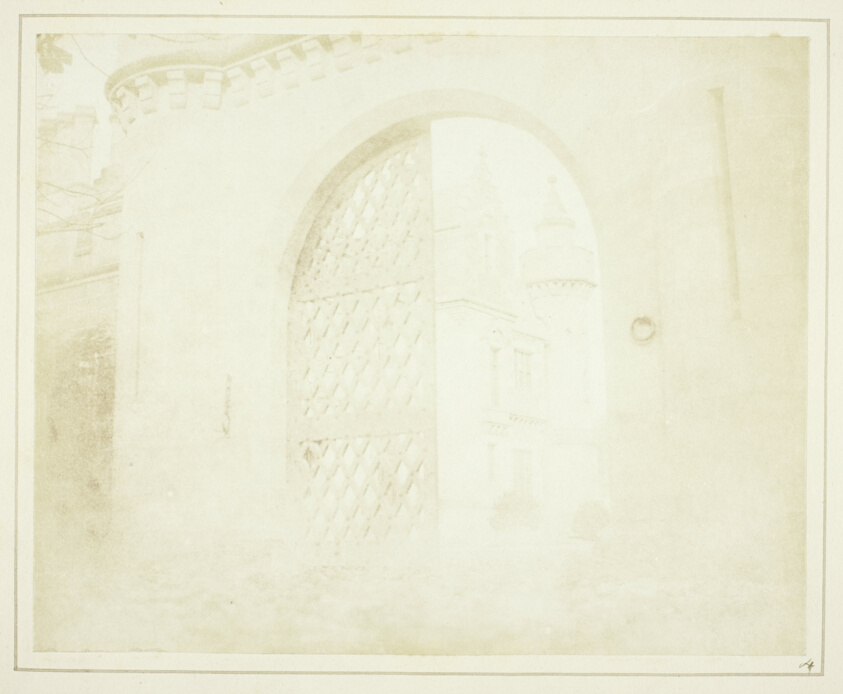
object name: Photograph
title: Entrance Gate, Abbotsford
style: 19th century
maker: William Henry Fox Talbot (English, 1800–1877)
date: 1844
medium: Salted paper print, plate IV from the album "Sun Pictures in Scotland" (1845)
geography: England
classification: salted paper print; photographic process; photography; photograph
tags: Collected by Hugh Edwards